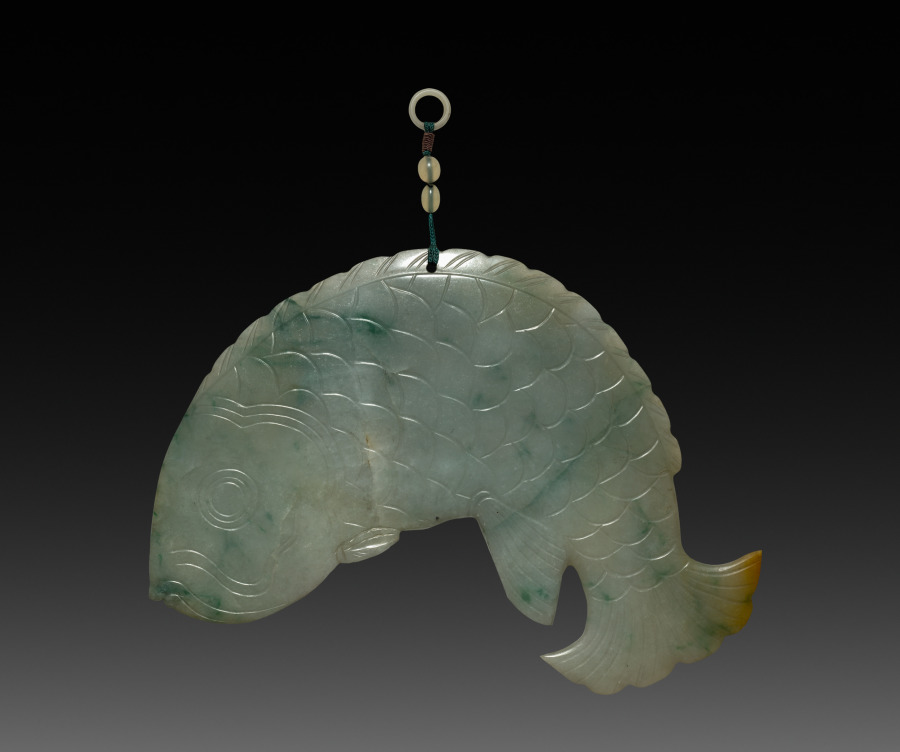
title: Gong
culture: China, Qing dynasty (1644-1911)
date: 1644–1911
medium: jade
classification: Jade